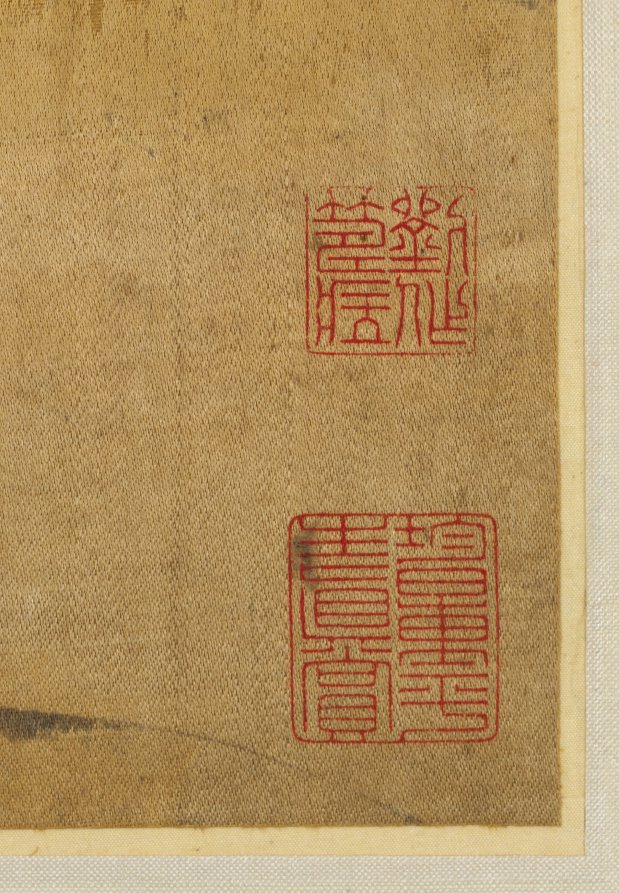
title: The Peach Blossom Spring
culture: China, Ming dynasty (1368–1644)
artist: Liu Du (Chinese, active c. 1628-after 1653)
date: 1650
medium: hanging scroll; ink and light color on satin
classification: Painting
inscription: Artist's inscription, signature, and 2 seals at middle right edge: In the tenth month of the gengyin year [1650], painted in imitation of Zhao Chengzhi [Chao Mengfu]. Liu Du [seals] Liu Du zhi yin; Shu xian.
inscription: 2 additional seals of Low Chuck Tiew 劉作籌 (1911–1993).